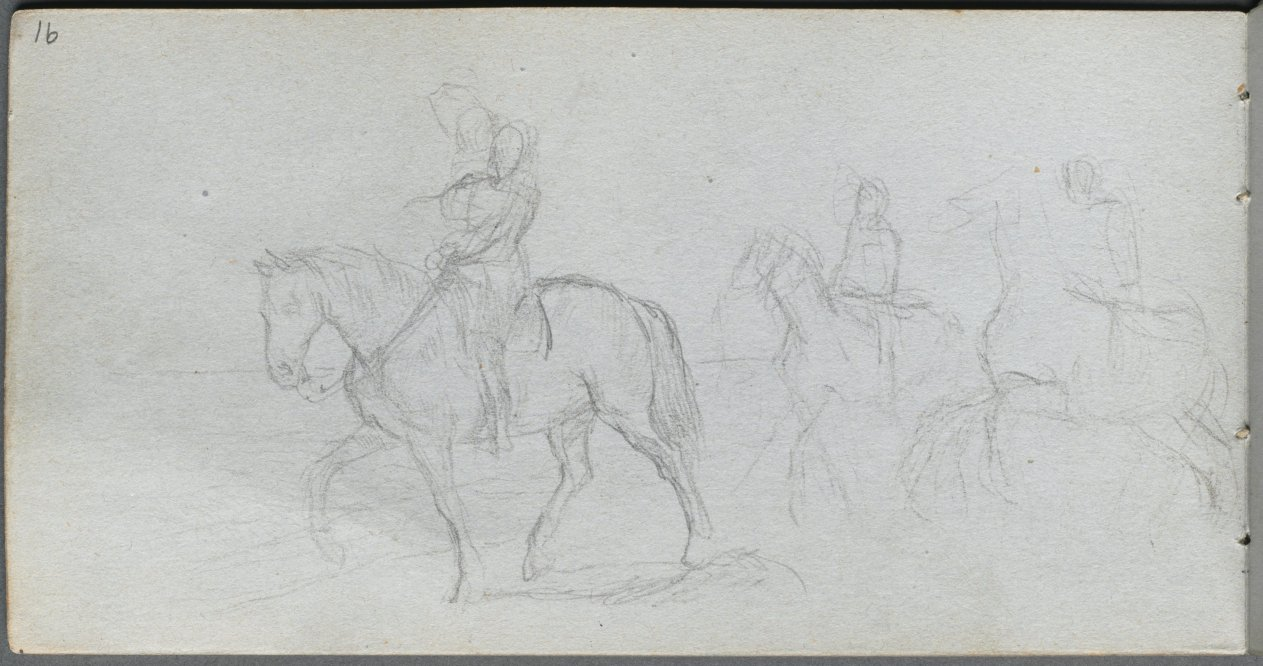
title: Sketchbook, page 91: Figures on Horseback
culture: France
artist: Ernest Meissonier (French, 1815–1891)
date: c. 1860s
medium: graphite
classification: Bound Volume